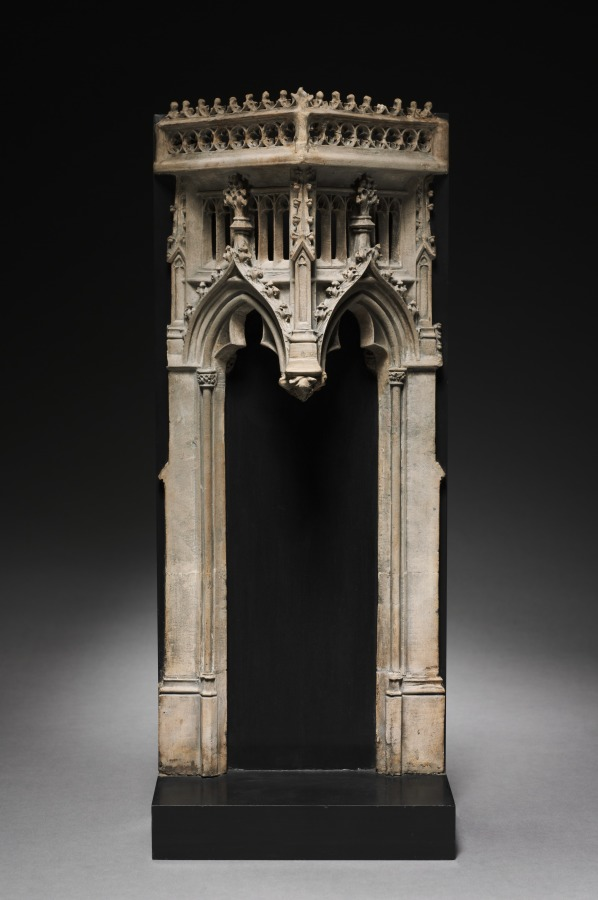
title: Architectural Canopy (pair)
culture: France, Burgundy, 15th century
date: c. 1450–1475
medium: limestone from Tonnerre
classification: Sculpture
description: Part of a pair of canopies, both must have originally belonged to an architectural ensemble like a tomb or a choir screen set within a church. Strikingly carved as architecture in miniature, they contain all of the elements of Flamboyant Gothic architecture of the late 15th century, so named after its flame-like stone tracery with wavy ornaments. This style of architecture is characterized by its intricacy of detailing and virtuosity of workmanship. Small sculptures may have originally occupied the space beneath the canopies.